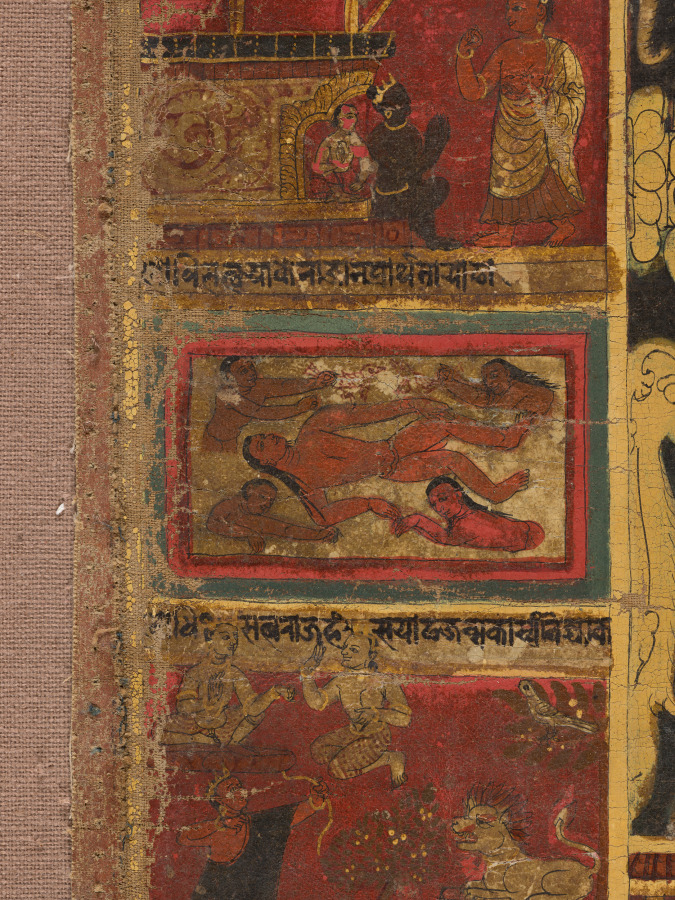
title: Bejeweled Buddha Preaching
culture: Nepal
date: 1648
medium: Gum tempera, ink, and gold on cloth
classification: Painting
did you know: Nepalese devotional paintings on cloth are called "paubha" in the Newari language.